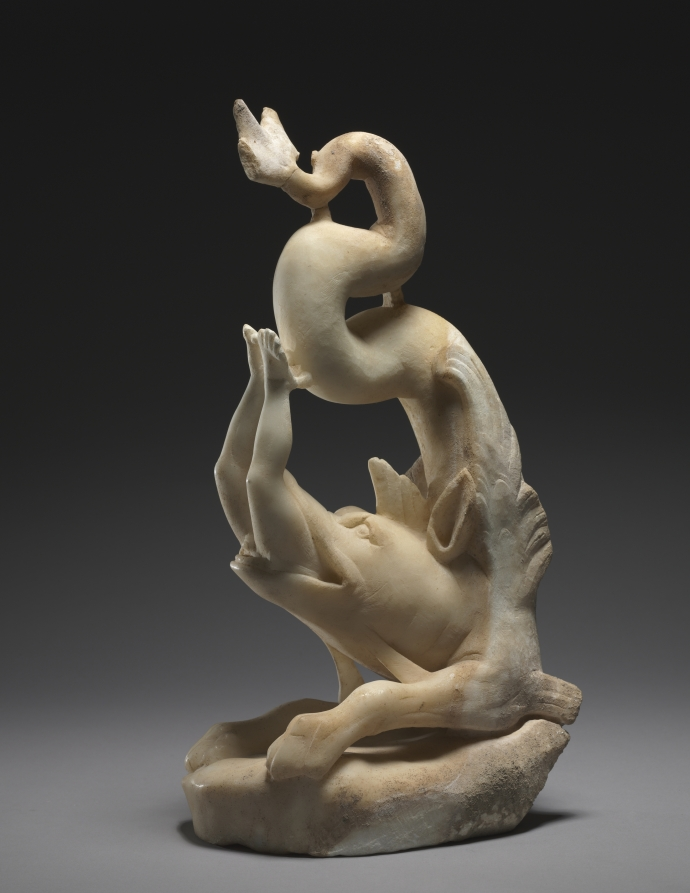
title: Jonah Swallowed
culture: Anatolia, late Roman-early Christian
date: 280–90 CE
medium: marble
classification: Sculpture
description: After disobeying the Lord’s command to proclaim judgment on the city of Nineveh, the Old Testament prophet Jonah was cast into the sea and swallowed by a sea monster. Here, the beast swallows Jonah headfirst.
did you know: Although usually thought of as a whale, here the artist has depicted Jonah swallowed by a cetus, a large, monstrous sea creature.